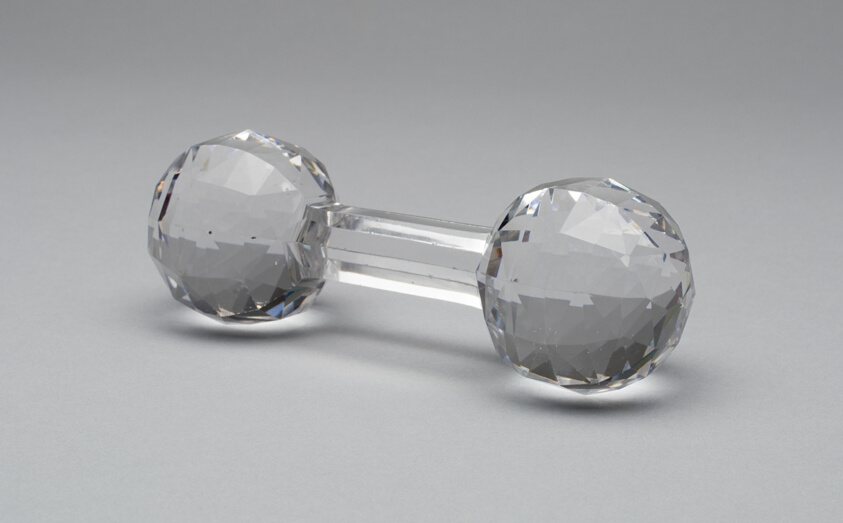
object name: Glass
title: Knife rest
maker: Artist unknown (American, 19th–20th century)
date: c. 1902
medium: Cut glass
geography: United States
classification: glass; culinary equipment; accessory table equipment; knife rest; american decorative arts; american arts; decorative arts